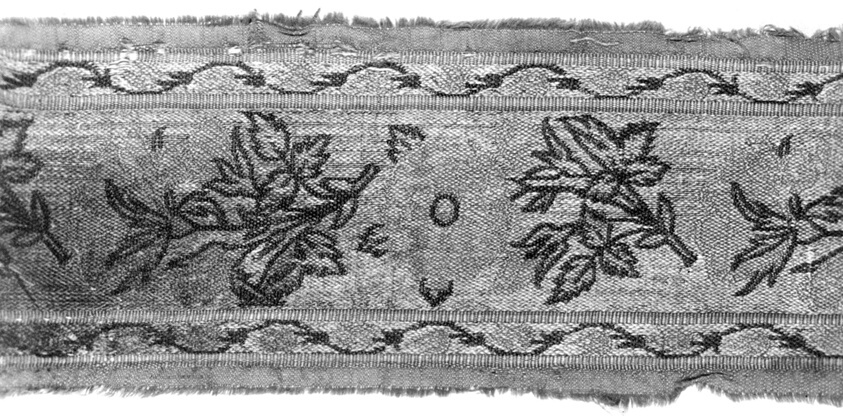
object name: Textile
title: Fragment (Border)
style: isfahan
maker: Iran (Persia, Isfahan)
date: 17th century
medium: Brocaded compound cloth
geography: Iran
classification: textile; weaving